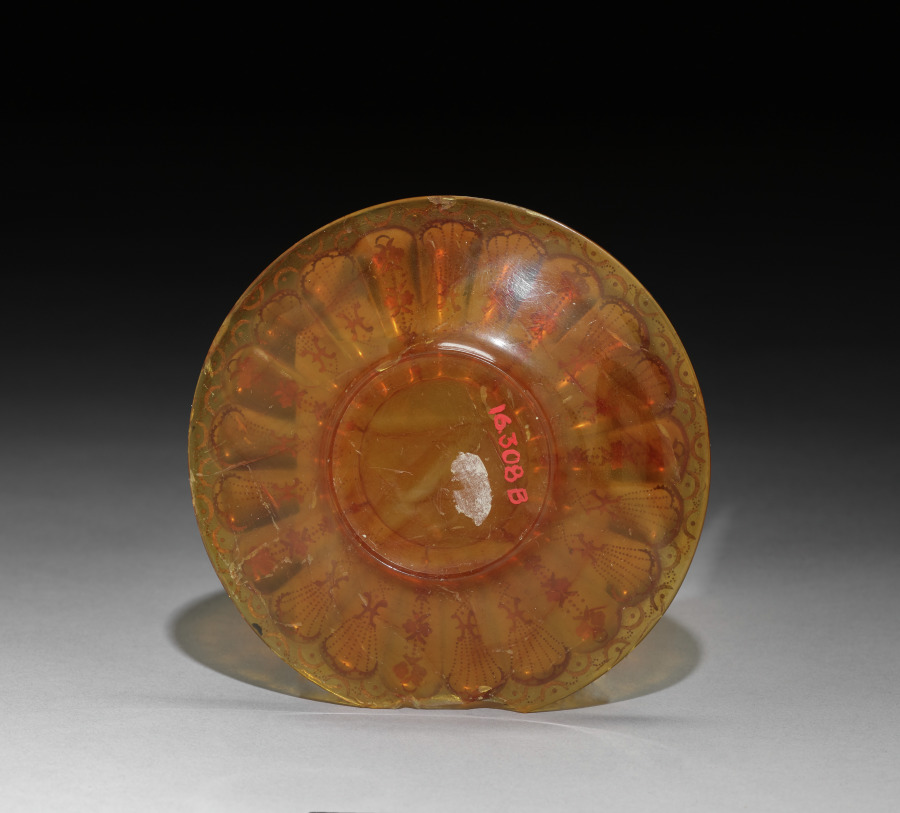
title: Saucer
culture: France, 18th century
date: c. 1730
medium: amber decorated with inlaid gold and mother-of-pearl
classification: Miscellaneous